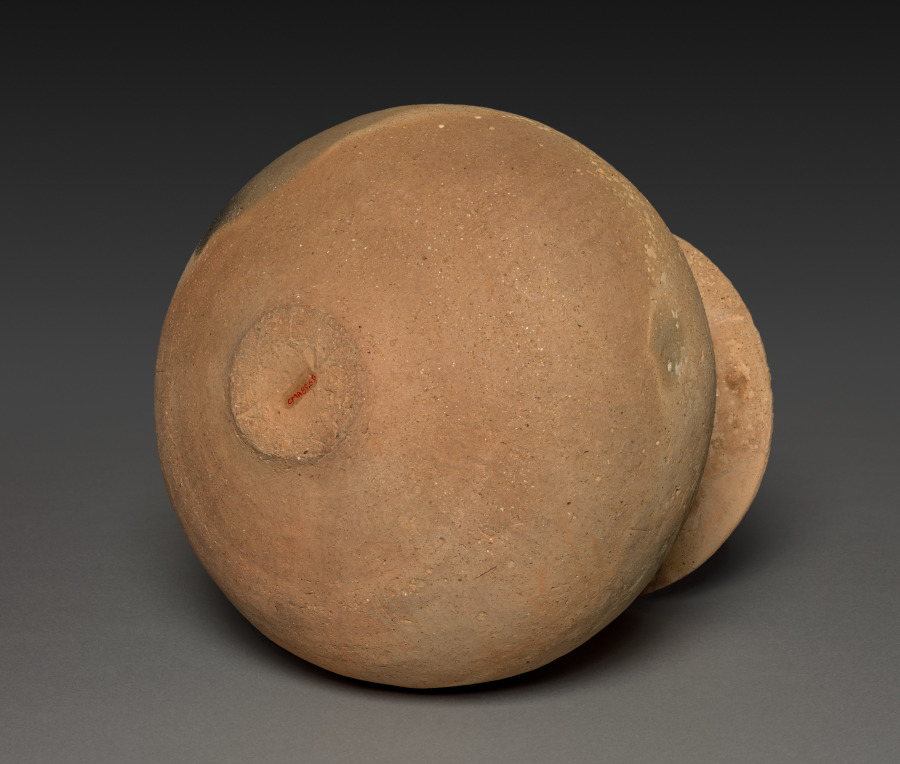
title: Vessel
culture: Japan, Yayoi period (c. 300 BCE–300 CE)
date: 300s BCE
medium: Earthenware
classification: Ceramic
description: Pottery existed for thousands of years in Japan before the Yayoi period, but the development of wet rice agriculture and permanent settlements by previously nomadic communities changed its form significantly. Yayoi period pots were aimed more at long-term storage than those from prior millennia. Their smooth, unadorned surfaces and round shapes also reflect the style of contemporaneous works from the Korean peninsula, indicating the strong ties between Japanese communities and Korean kingdoms at the time.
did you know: Yayoi ceramics, like this example, were likely made by laying one coil of clay on top of another to form the body of the vessel.